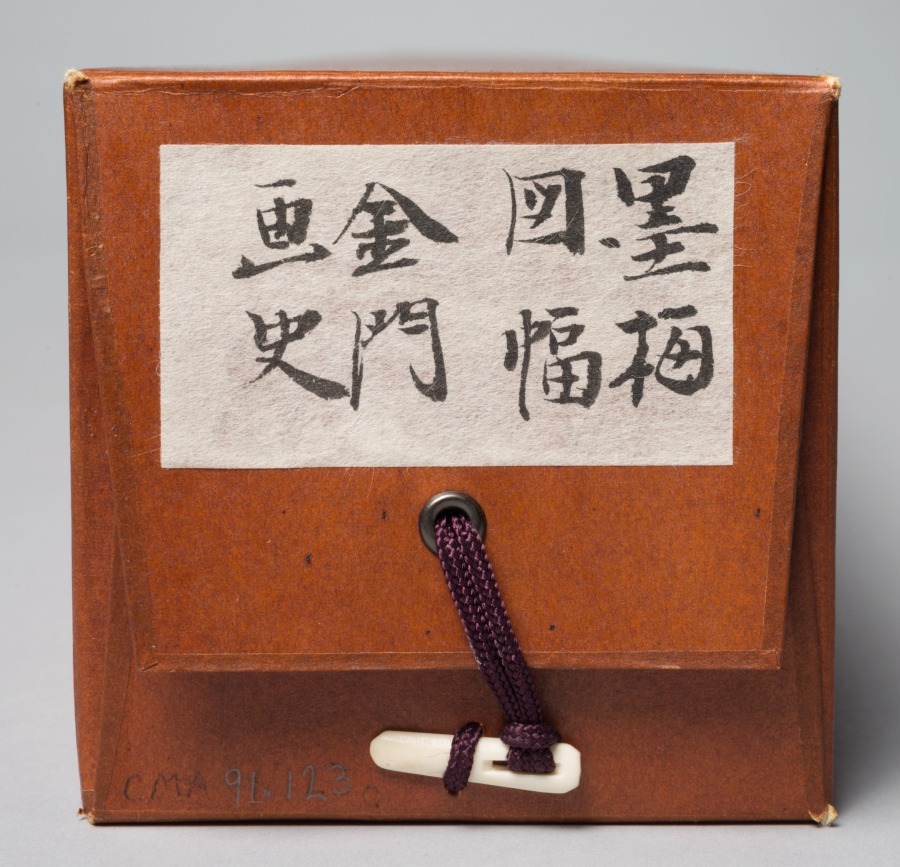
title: Prunus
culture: Japan, Edo period (1615–1868)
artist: attributed to Kano Einō (Japanese, 1631–1697)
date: mid- to late 1600s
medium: hanging scroll; ink on paper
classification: Painting